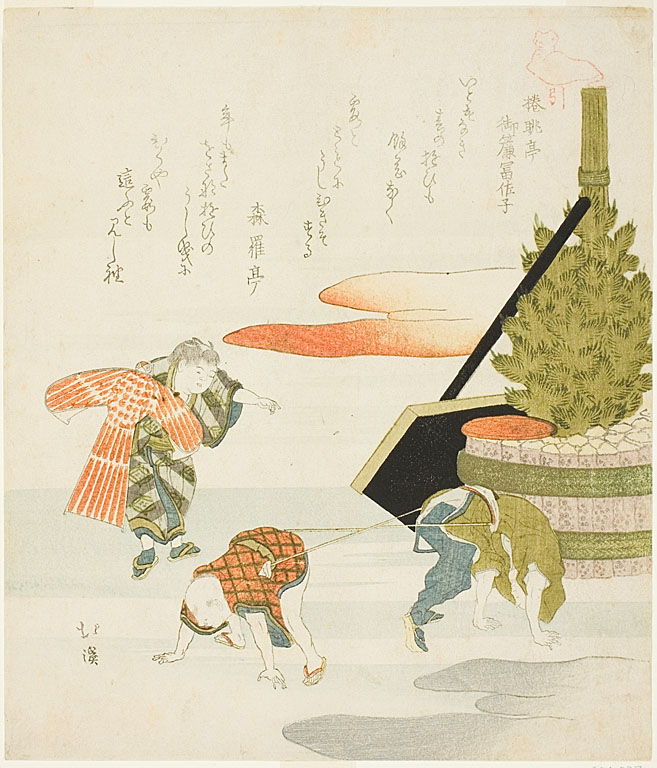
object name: Print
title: Children Playing Tug of War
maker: Totoya Hokkei (Japanese, 1780-1850)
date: early 19th century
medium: Color woodblock print; surimono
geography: Japan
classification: woodblock print; print; asian art